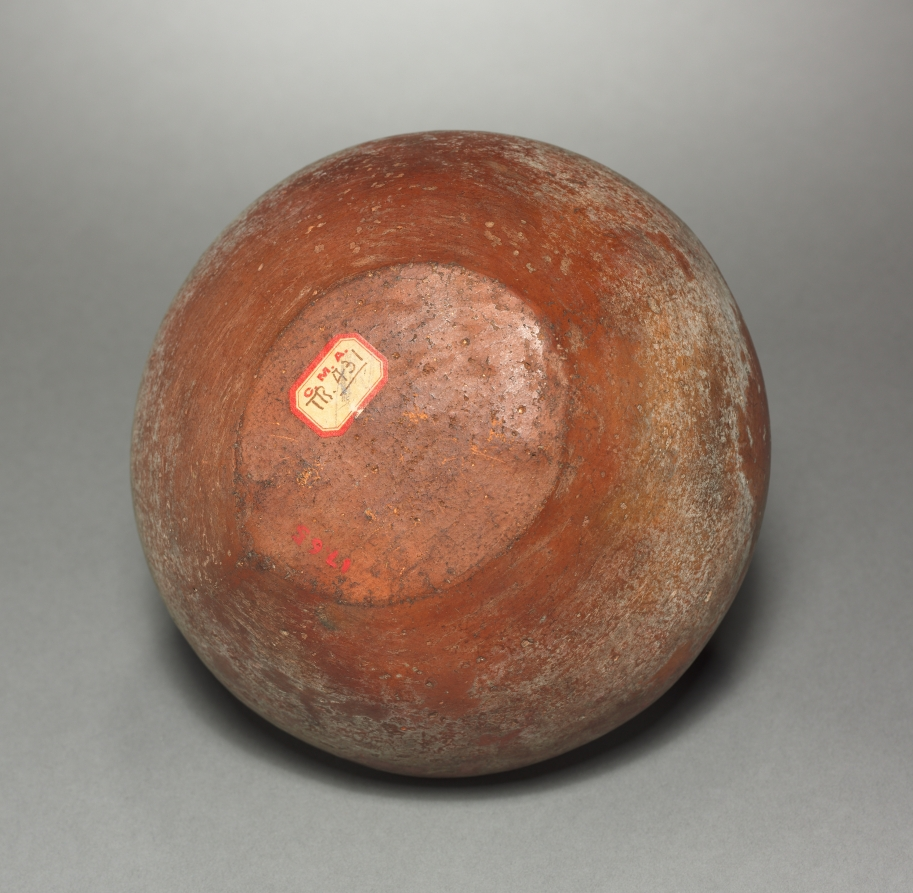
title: Bottle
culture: Peru, Pachacamac, Tiwanaku style, 400-1000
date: 400–1000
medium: pottery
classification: Ceramic